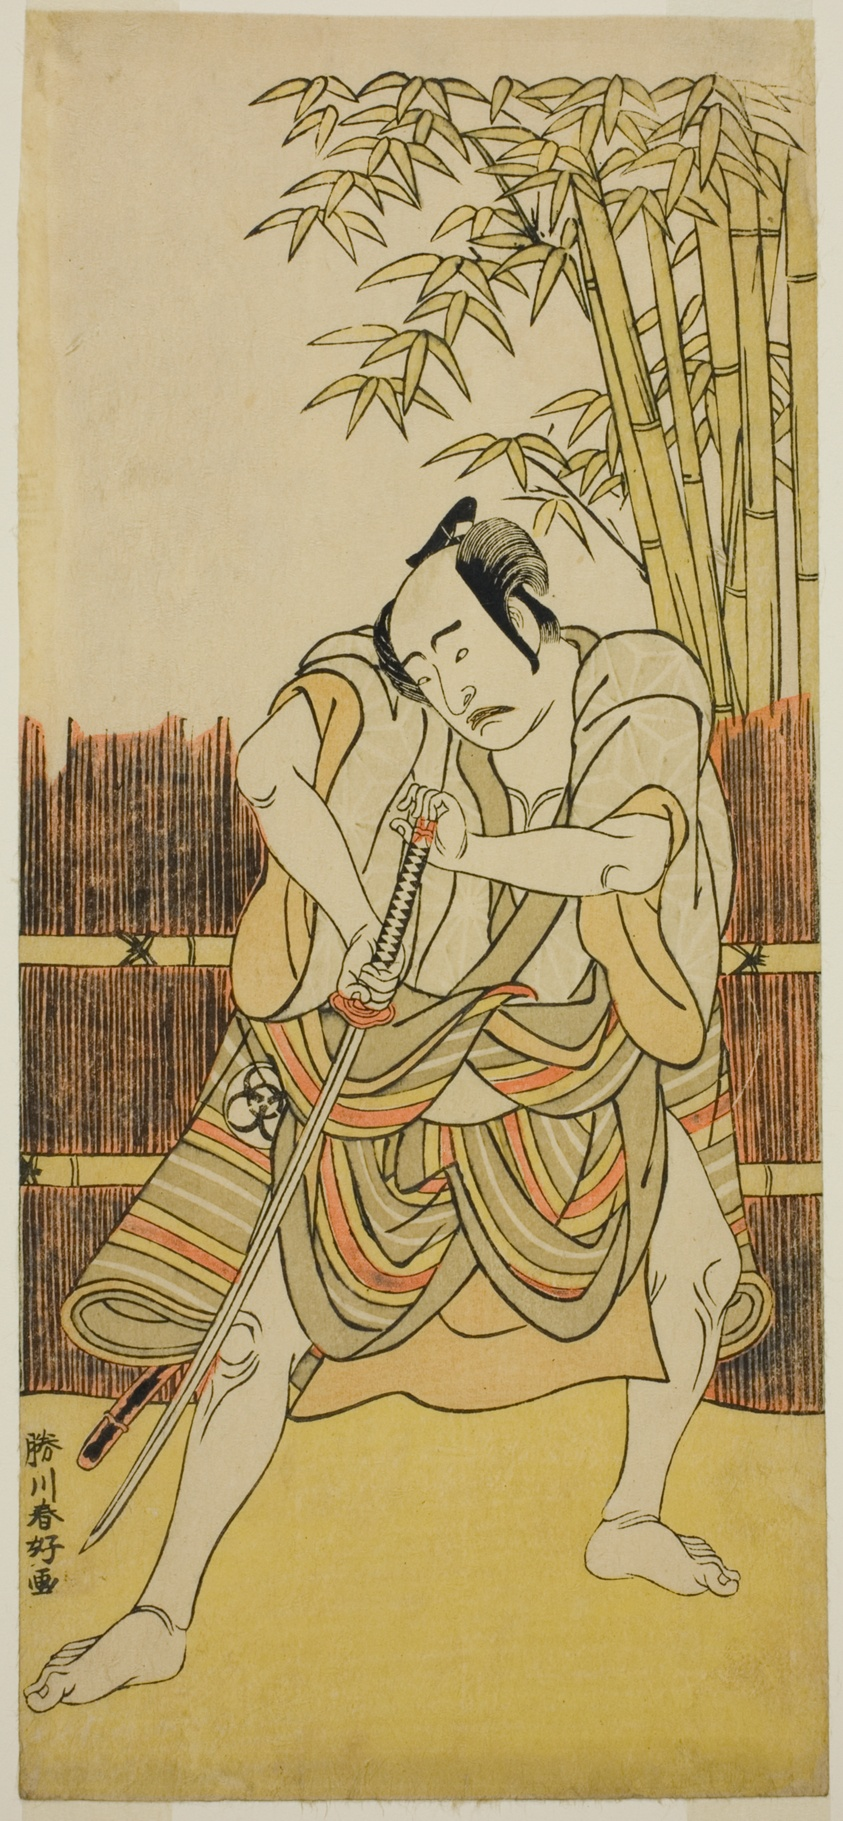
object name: Print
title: The Actor Bando Mitsugoro I as Ogata no Saburo Disguised as Yoroya Takiemon in the Play Mure Takamatsu Yuki no Shirahata, Performed at the Ichimura Theater in the Eleventh Month, 1780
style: Japanese (culture or style)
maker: Katsukawa Shunko I; Japanese, 1743-1812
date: c. 1780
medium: Color woodblock print; hosoban; right sheet of diptych (?)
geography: Japan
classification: woodblock print; print; asian art